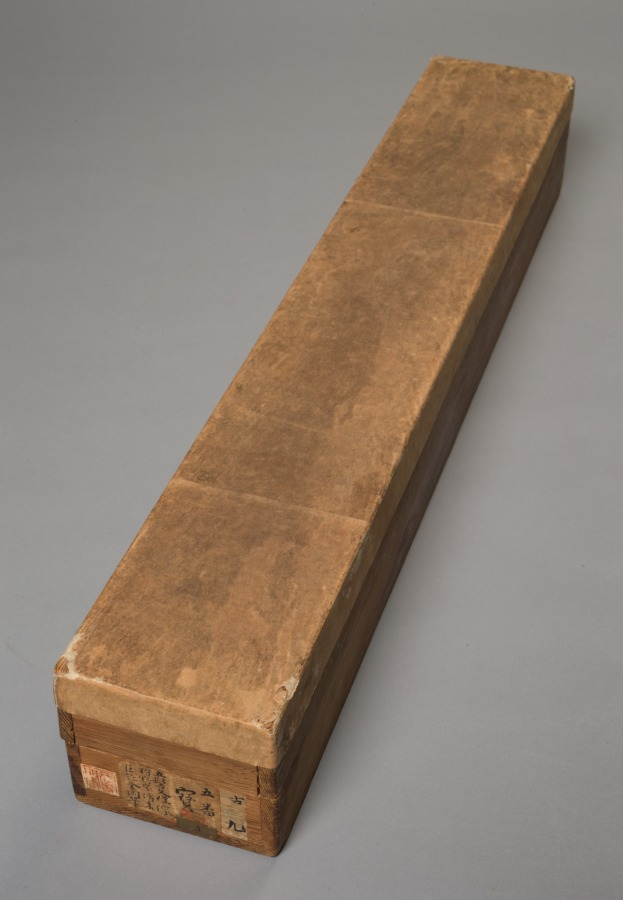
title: Monju with Five Hair Knots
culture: Japan, Kamakura period (1185–1333)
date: late 1200s–early 1300s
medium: Hanging scroll; ink, color, gold, and cut gold on silk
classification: Painting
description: This Buddhist painting shows Monju, Manjushri in Sanskrit, riding a lion. Monju is a bodhisattva, a being who, though enlightened, chooses not to become a Buddha but instead helps others achieve enlightenment. Monju’s youthfulness symbolizes his pure wisdom, unsullied by the world, and his five hair knots represent his vow to keep calamity at bay. The supernatural nature of his lion is emphasized by its hair, every strand painted in gold, as well as by the lotus platforms beneath each of its feet. The boy’s bejeweled body and silk finery is meant to resemble that of an Indian prince.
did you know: This painting is exemplary of the Kamakura period, known for artworks with special attention paid to the realism of images.